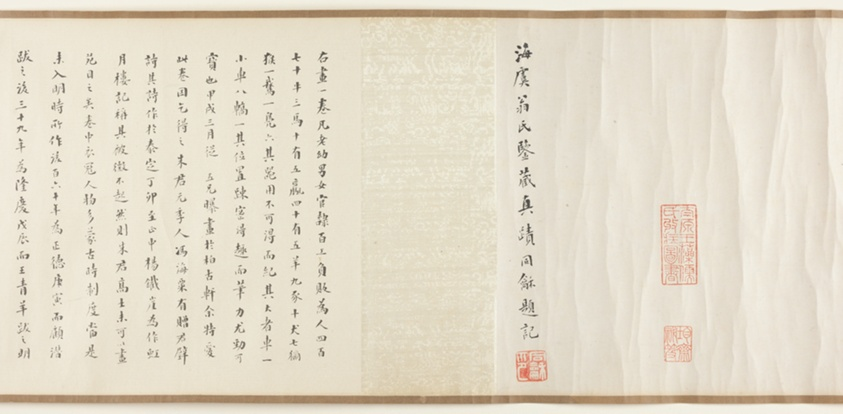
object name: Painting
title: Street Scenes in Times of Peace 太平風會圖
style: Chinese (culture or style)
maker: Zhu Yu (Zhu Junbi) 朱玉（朱君璧）; Chinese, 1293-1365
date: Yuan dynasty (1279–1368), 14th century 元朝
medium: Handscroll; ink and colors on paper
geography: China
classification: handscroll; painting; asian art